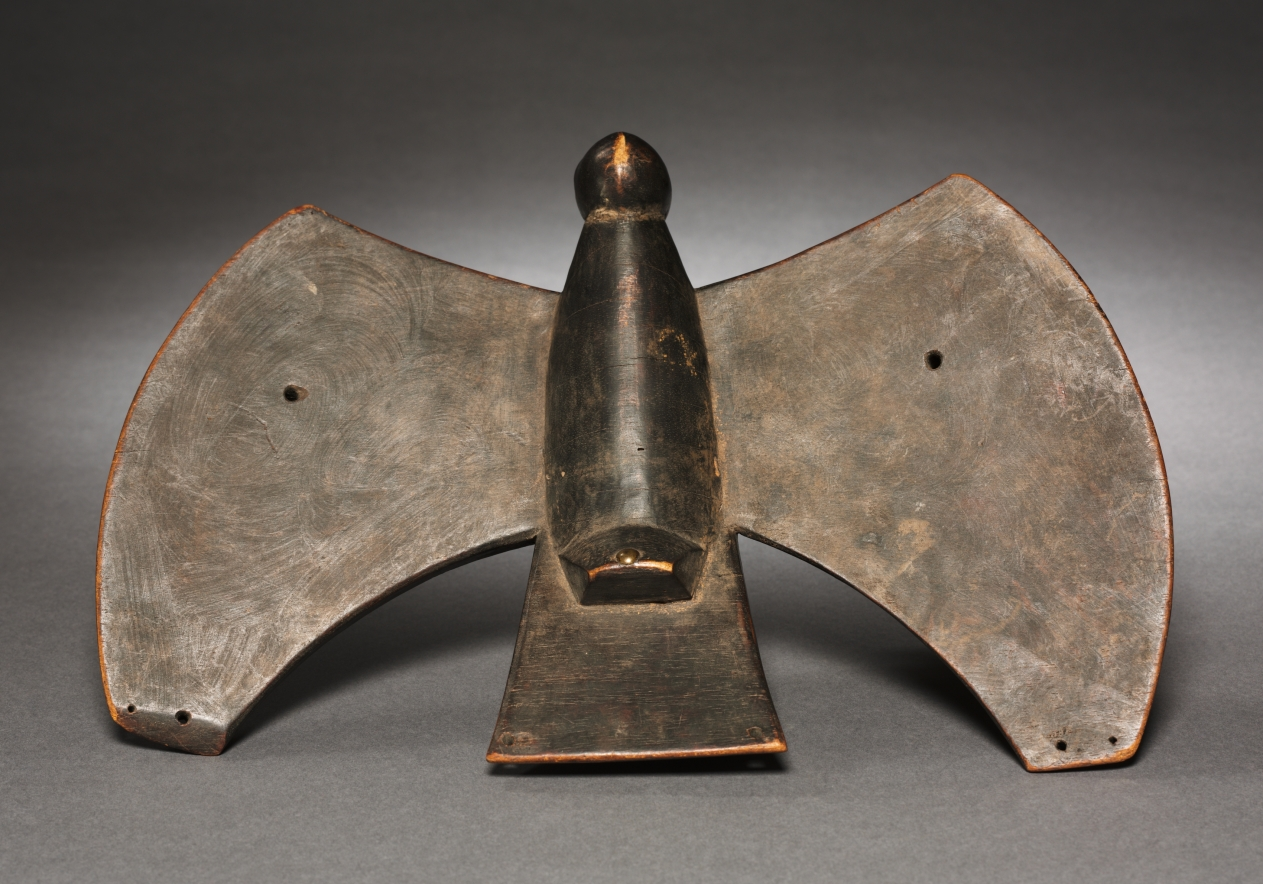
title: Bird Standard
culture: Africa, West Africa, Côte d'Ivoire, Senufo-style carver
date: early to mid-1900s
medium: Wood and upholstery studs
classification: Sculpture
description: An eagle depicted in flight originally surmounting a long staff, the bird standard is offered to the winner of a hoeing contest between young men. The competition is not only meant to promote social cohesion and solidarity, it also serves to encourage fertility. Honoring the endurance of a victorious farmer, such a bird standard is also used as a display sculpture during the funeral of a former champion or a member of his courtyard or family unit.